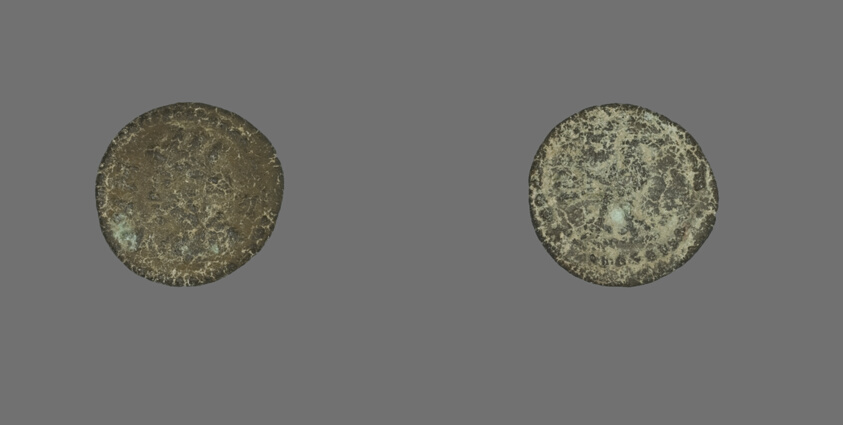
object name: Coin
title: Coin Depicting the Goddess Tyche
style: roman (ancient, style or period), ancient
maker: Roman, minted in Cyme, Acolis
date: about 253-268 CE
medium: Bronze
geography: Rome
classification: coin; ancient art